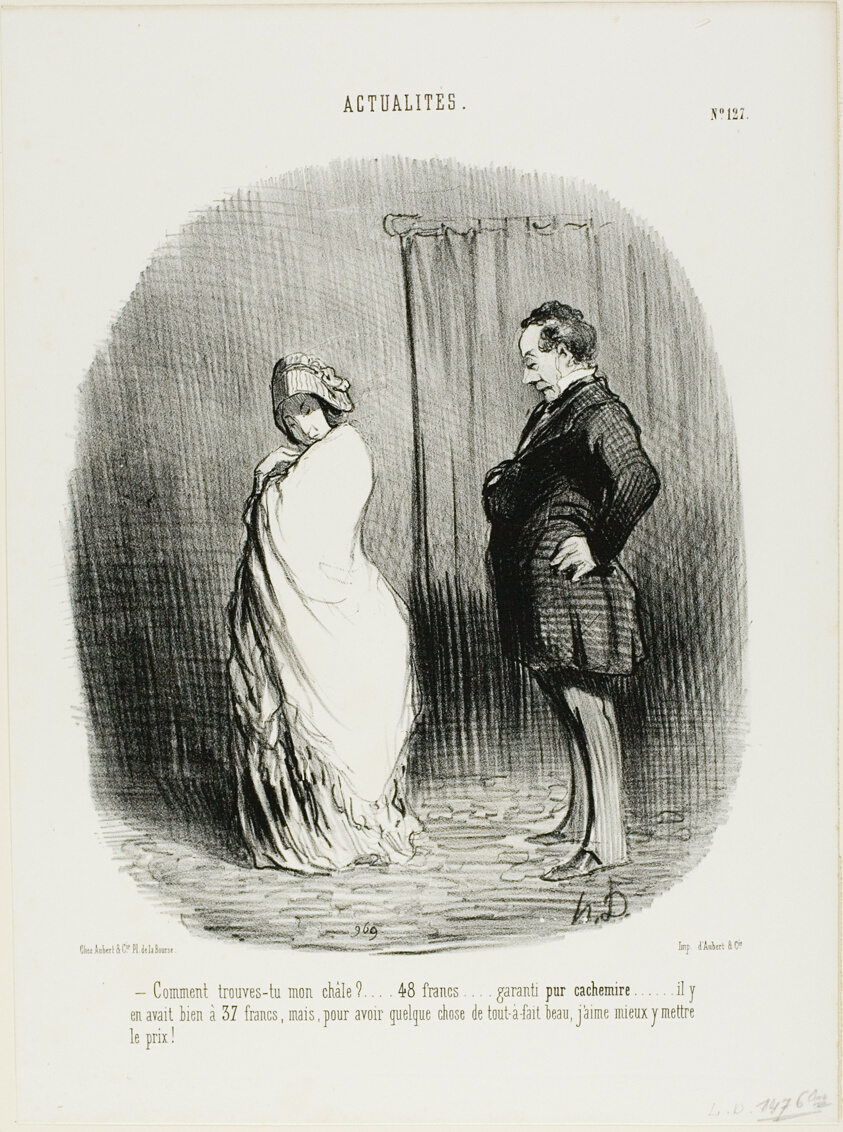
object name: Print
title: Marriage of "L'époque" and "Le Constitutionnel". Bilboquet: “- Honourable couple, I hereby unite you and bless you. Go and grow in format and may your almanacs multiply!,” plate 125 from Actualités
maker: Honoré Victorin Daumier; French, 1808-1879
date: 1846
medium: Lithograph in black on white wove paper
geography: France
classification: lithograph; print; prints and drawing